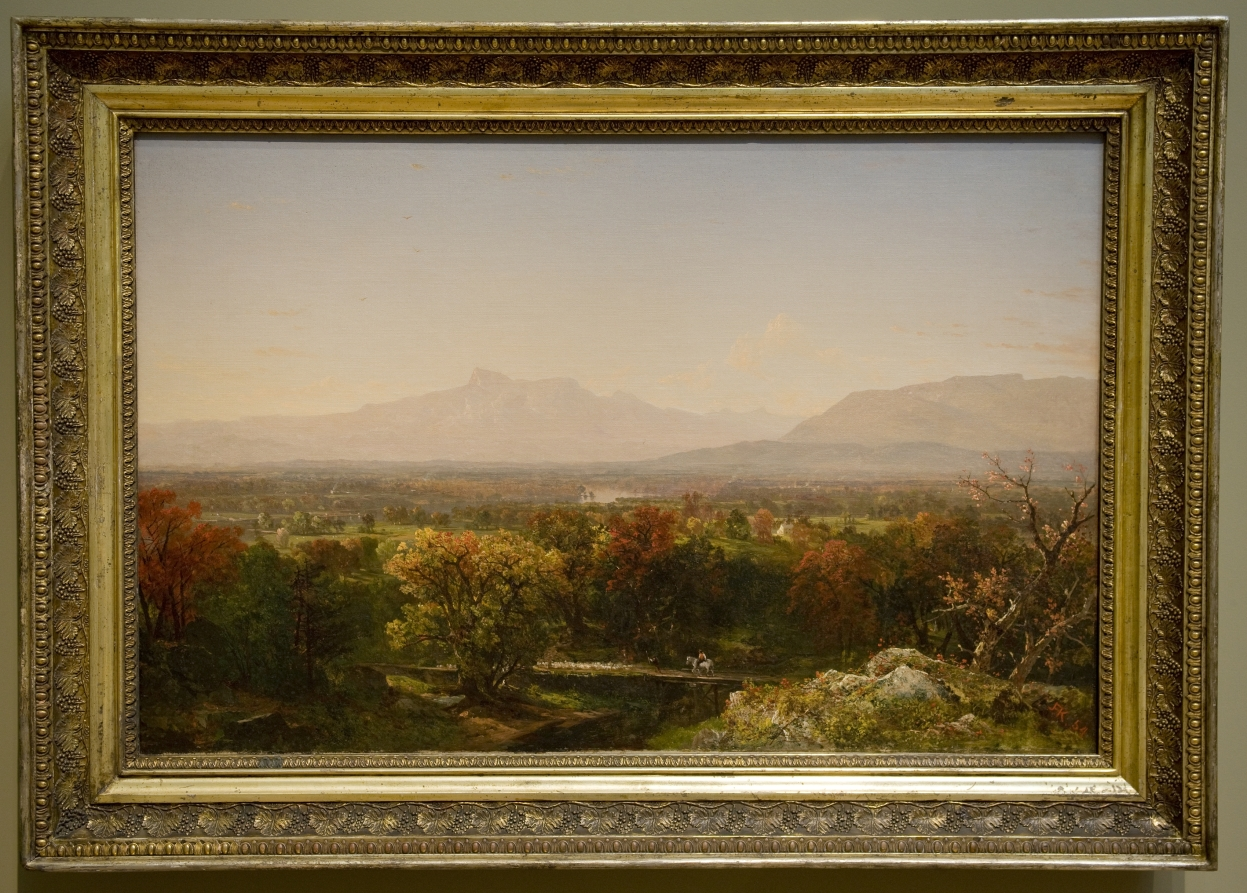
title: An October Day in the White Mountains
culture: America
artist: John Frederick Kensett (American, 1816–1872)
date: 1854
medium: oil on canvas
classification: Painting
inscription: Signed lower right: "JF.K. 54 [JF in monogram]"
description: After railroad service to the area was improved in the early 1850s, the White Mountains in New Hampshire became a favored destination for tourists and artists seeking to commune with nature. New York-based Kensett painted several views, including this distant rendering across the Saco River of Mount Chocorua, one of the most distinctive peaks in the region.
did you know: Kensett was a selfless individual known for his charity work and helping fellow artists.